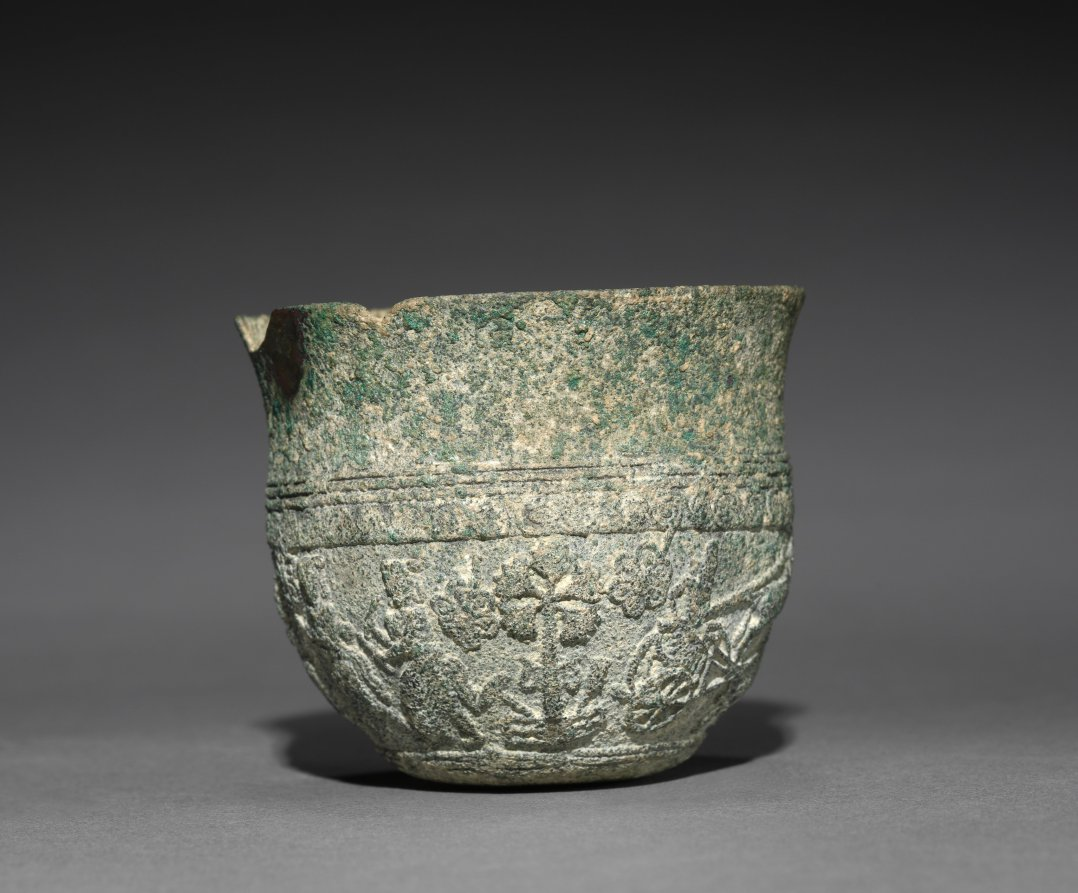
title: Libation Cup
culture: India, Maurya period (322–185 BCE)–Shunga period (185–78 BCE)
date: c. 235–185 BCE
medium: bronze, lost wax technique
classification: Metalwork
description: The remarkably clear, tiny carvings in an uninterrupted frieze around the lower section include one sacred palm tree and one fig tree (ficus religiosa) that divide the space into two main scenes. One features female musicians, the other has two chariots, each drawn by a pair of galloping horses. Bulls, birds, and flowers fill the background spaces. This cup is from a group found in an area with close links to Indo-Greek kingdoms, and the chariots and framing motifs reveal knowledge of Hellenistic art.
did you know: The tree carved into the cup is of the same species as the Bodhi tree, under which the Buddha reached enlightenment.